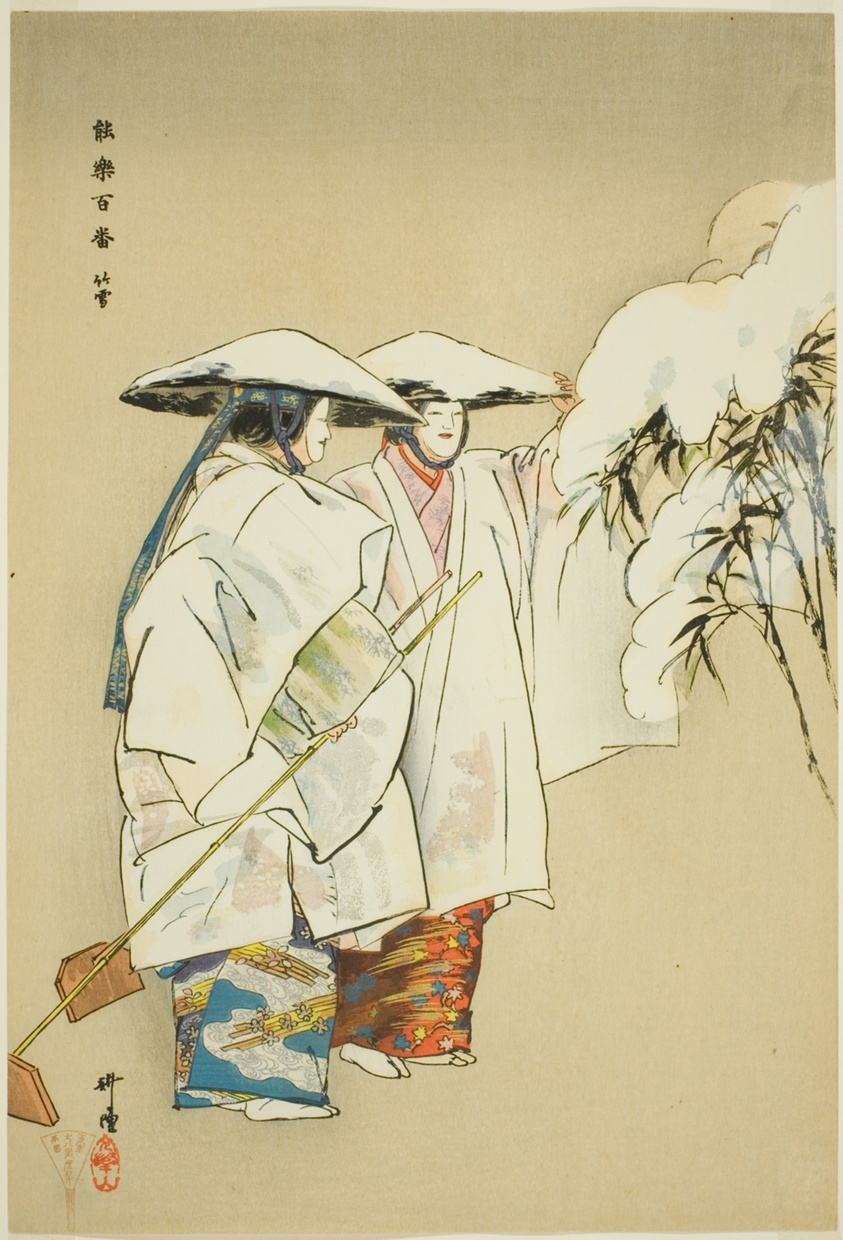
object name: Print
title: Take no Yuki, from the series "One Hundred No Dramas (Nogaku hyakuban)"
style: Japanese (culture or style)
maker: Tsukioka Kogyo; Japanese, 1869-1927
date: 1898/1903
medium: Color woodblock print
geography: Japan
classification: woodblock print; print; asian art